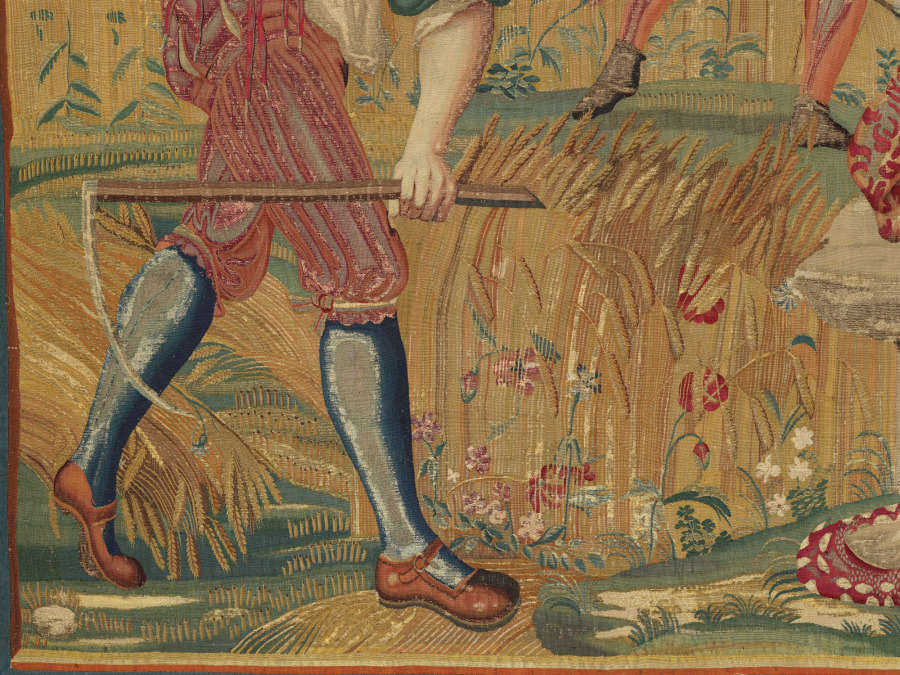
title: Summer: Harvest Scene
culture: France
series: Four Seasons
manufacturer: possibly by Gobelins Manufactory (France, Paris, est. 1662)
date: designed c. 1535, woven mid- to late 1600s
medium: Wool, silk, and gold filé: tapestry weave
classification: Tapestry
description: The wheat harvest took place in July and represented the hard, hot work of summer. The reaper in the foreground and his companion in the middle distance swing their scythes high above their heads as they prepare to cut the wheat stalks. Underneath the shade of an apple tree, three figures in the foreground are determining a price for the wheat. A woman gestures to the coins that the seated man is counting. Behind them another man holds an account book, in which he records their decisions. His pen holder and ink pot hang from his belt. In the distance to the right, two horses draw a cart piled high with wheat toward four farmers who gather bunches of wheat stalks together and tie them into bundles.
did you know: Images of the harvest provided a way to express pride in the fruitfulness and plenty of a particular region and celebrate the diligence of the field laborers.